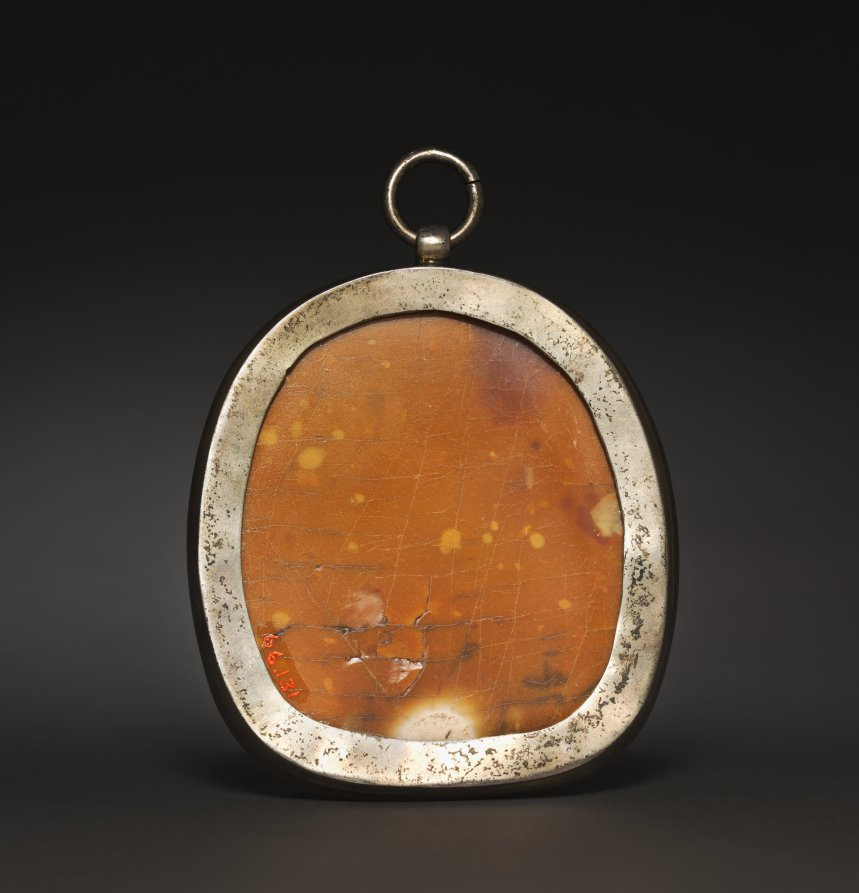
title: Cameo of Zeus and Hera Enthroned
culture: Italy, Roman, style of 2nd Century (forgery)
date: Late 1800s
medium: shell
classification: Jewelry